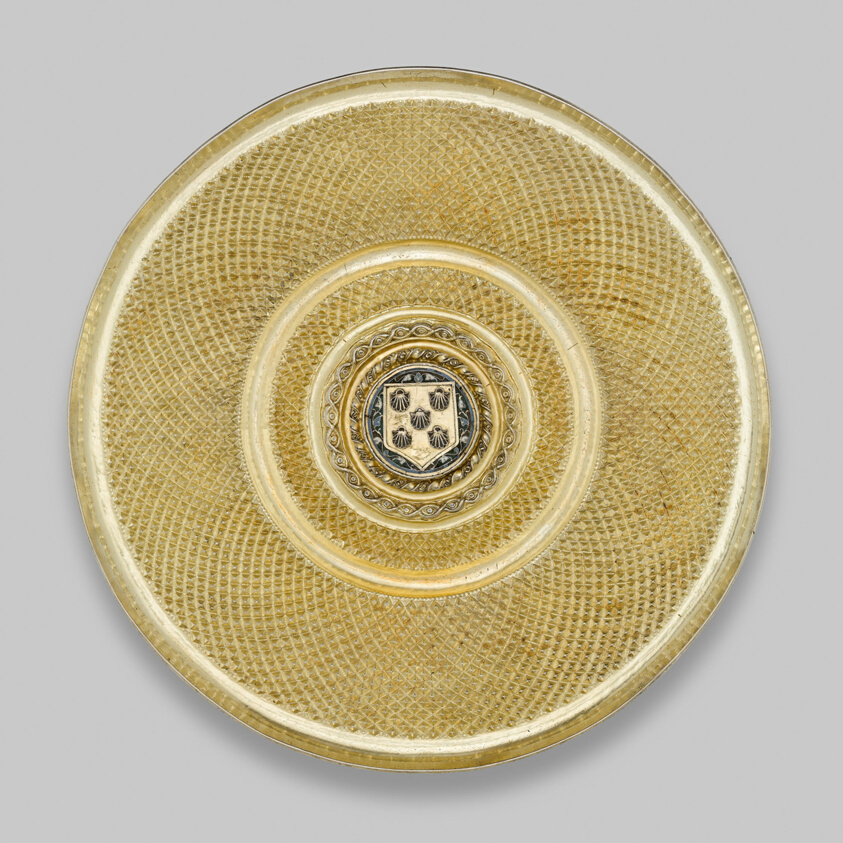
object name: Decorative Arts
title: Dish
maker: Portuguese; possibly Lisbon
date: c. 1500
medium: Silver gilt with champlevé enamel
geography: Lisbon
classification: silver; metalwork; european decorative arts; decorative arts